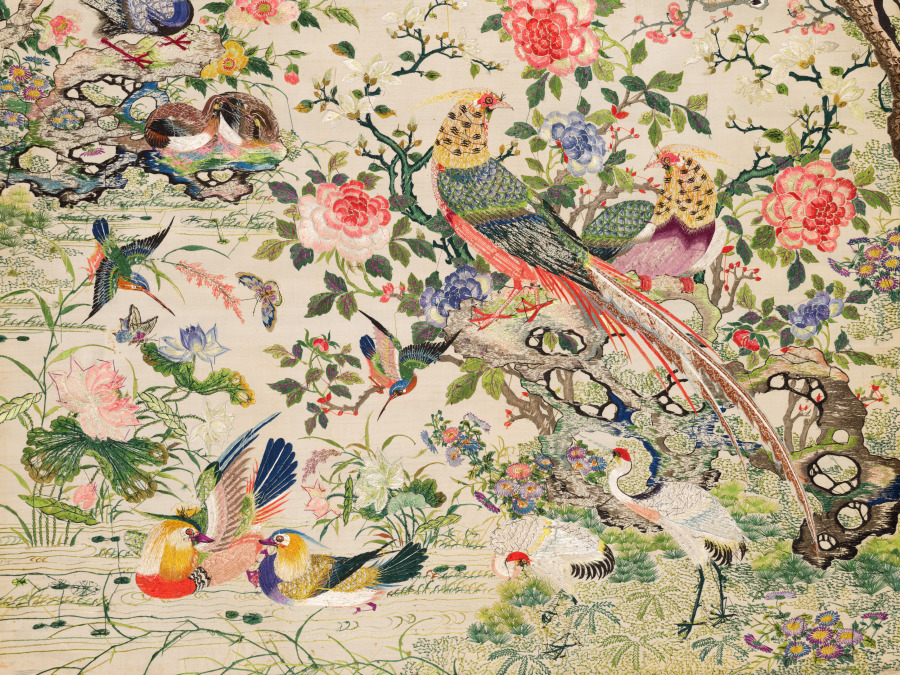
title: A Myriad of Birds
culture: China, Qing dynasty (1644–1911)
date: 1700s–1800s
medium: silk: satin weave with polychrome silk embroidery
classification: Embroidery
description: This embroidered panel, made with extremely fine silk threads, presents a lavishly detailed composition filled with fortuitous imagery. Pairs of birds, including mandarin ducks, peacocks, cranes, swallows, and pheasants, move among flowering trees, ornamental rocks, and aquatic plants, symbolizing harmony, prosperity, and longevity. Cranes stand for longevity, while a pair of mandarin ducks convey wishes for a harmonious marriage. Inspired by the decorative bird-and-flower paintings of the artist Lü Ji, the work prioritizes symbolism over spatial logic. With vibrant colors, meticulous stitching, and fortuitous meaning, the embroidery exemplifies the technical brilliance of Qing dynasty textile art, rivaling the quality of imperial production.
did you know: This magnificent textile, probably executed by a woman, demonstrates the tradition of making embroidered pictures in imitation of paintings.